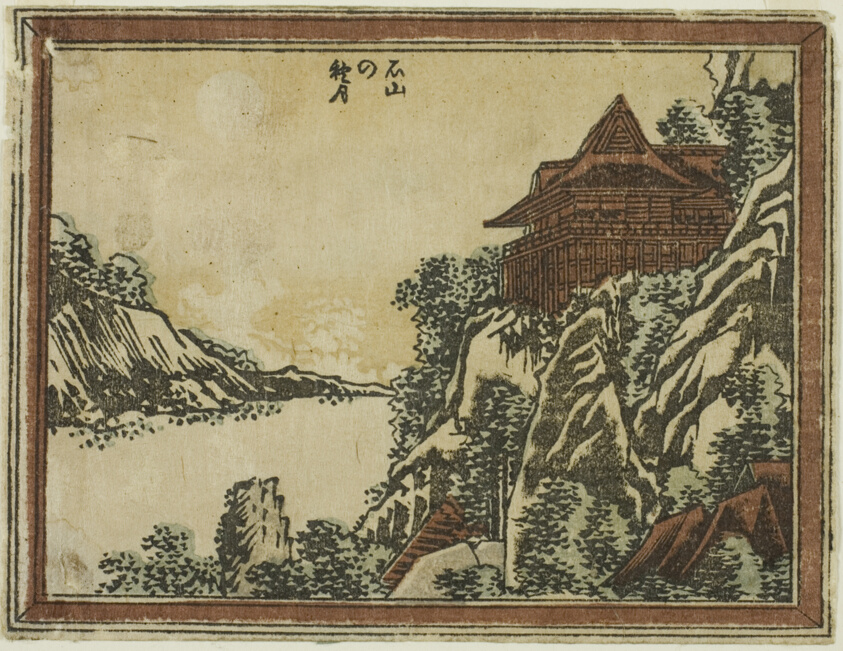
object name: Print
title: Autumn Moon at Ishiyama (Ishiyama no shugetsu) from the series Eight Views of Omi in Etching Style (Doban Omi hakkei)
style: Japanese (culture or style)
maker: Katsushika Hokusai 葛飾 北斎; Japanese, 1760-1849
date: 1804/16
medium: Color woodblock print; horizontal koban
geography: Japan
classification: woodblock print; print; asian art